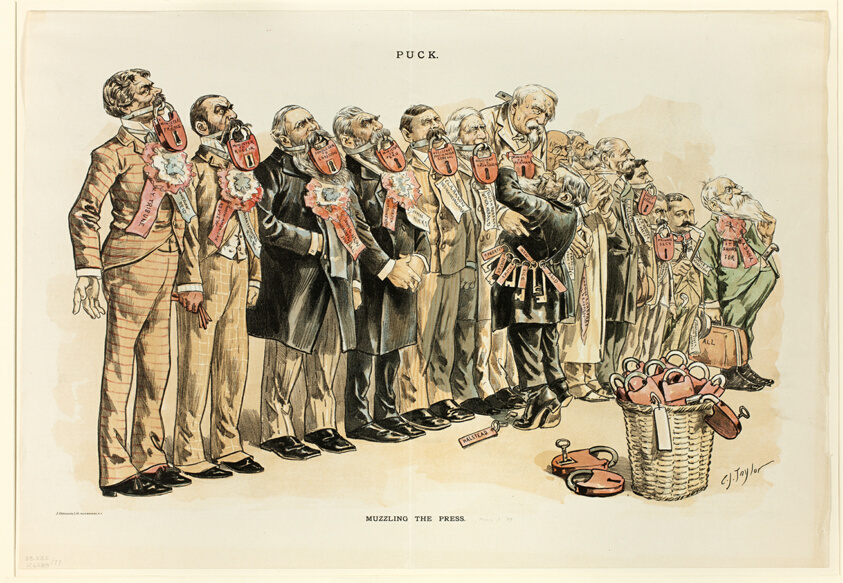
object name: Print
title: Muzzling the Press, from Puck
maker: Taylor, C. Jay (American, 1855-1929); Ottmann, J. (American, 19th century)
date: published May, 1889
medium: Lithograph on newsprint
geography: United States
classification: lithograph; print; prints and drawing